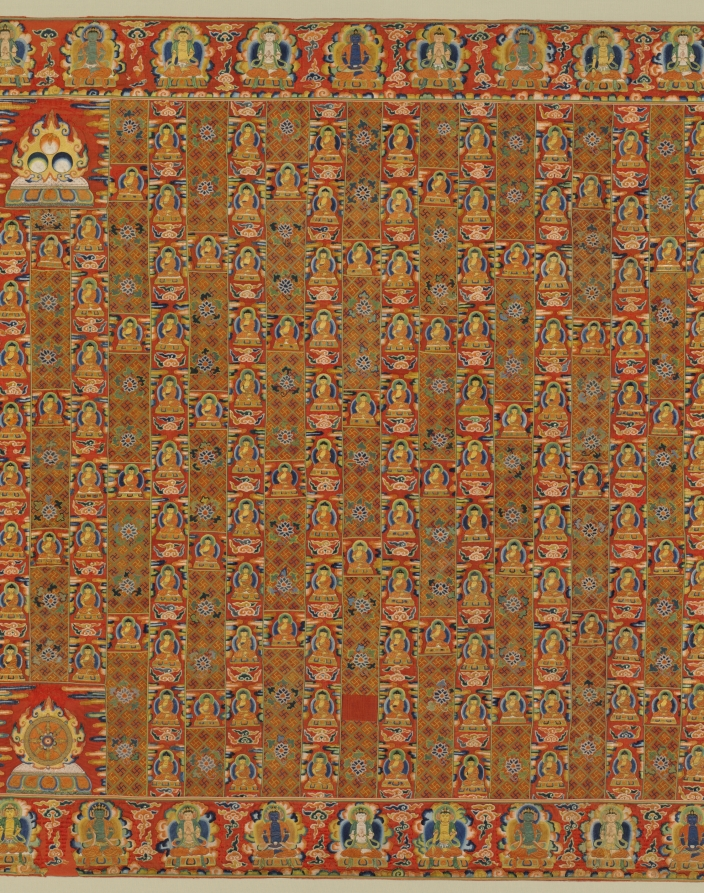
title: Buddhist Priest's Ceremonial Robe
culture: China, Ming dynasty (1368–1644)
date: 1400s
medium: silk and gold thread; embroidery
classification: Garment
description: This example of imperial embroidery is one of the earliest surviving Chinese Buddhist robes (kasaya) in the West. Depicting 991 Buddhas, each slightly different, it is constructed out of patches in reference to the legend in which the Buddha's favorite disciple divided a robe he was given into 30 pieces. Patchwork is also a sign of humility. Multiple Buddha images known as “thousand Buddha” designs are seen painted and sculpted on the walls of cave temples in India, Afghanistan, Central Asia, and China, but are rare on garments. The Four Heavenly Kings, guardians of the four directions, occupy the textile’s corners. When draped around the body, the inverted figures in the upper left corner appear right side up. Robes with 25 columns were worn by the highest-ranking clergy on ceremonial occasions.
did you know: The Five Transcendent Buddhas, who symbolize the purity of the five elements, are repeated around the edges.